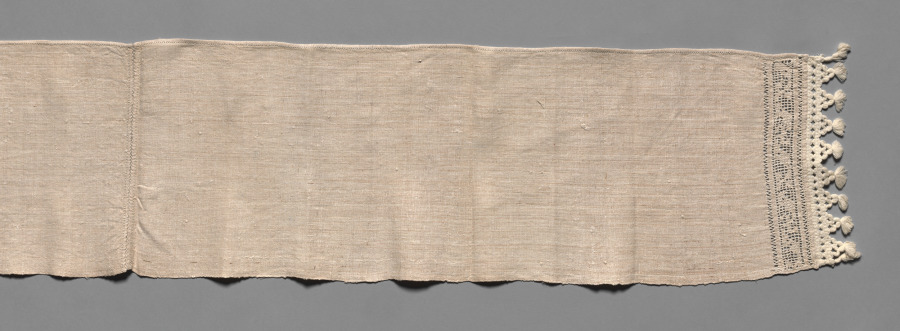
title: Towel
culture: Spain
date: 1900–1920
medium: Plain weave linen: needle lace (drawnwork); cotton: applied fringe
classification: Textile